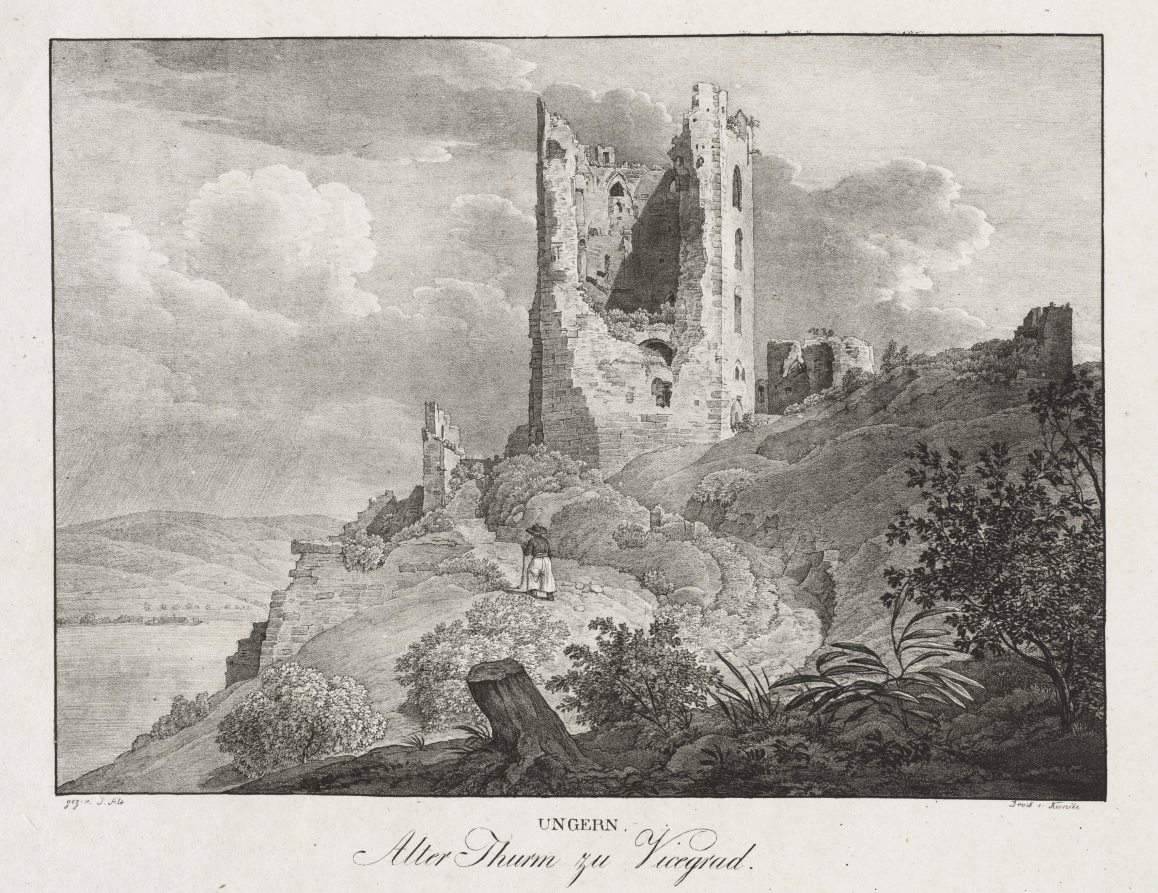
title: Ungern, Alter Thurn zu Vicegrad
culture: Austria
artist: Jakob Alt (Austrian, 1789–1872)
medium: lithograph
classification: Print